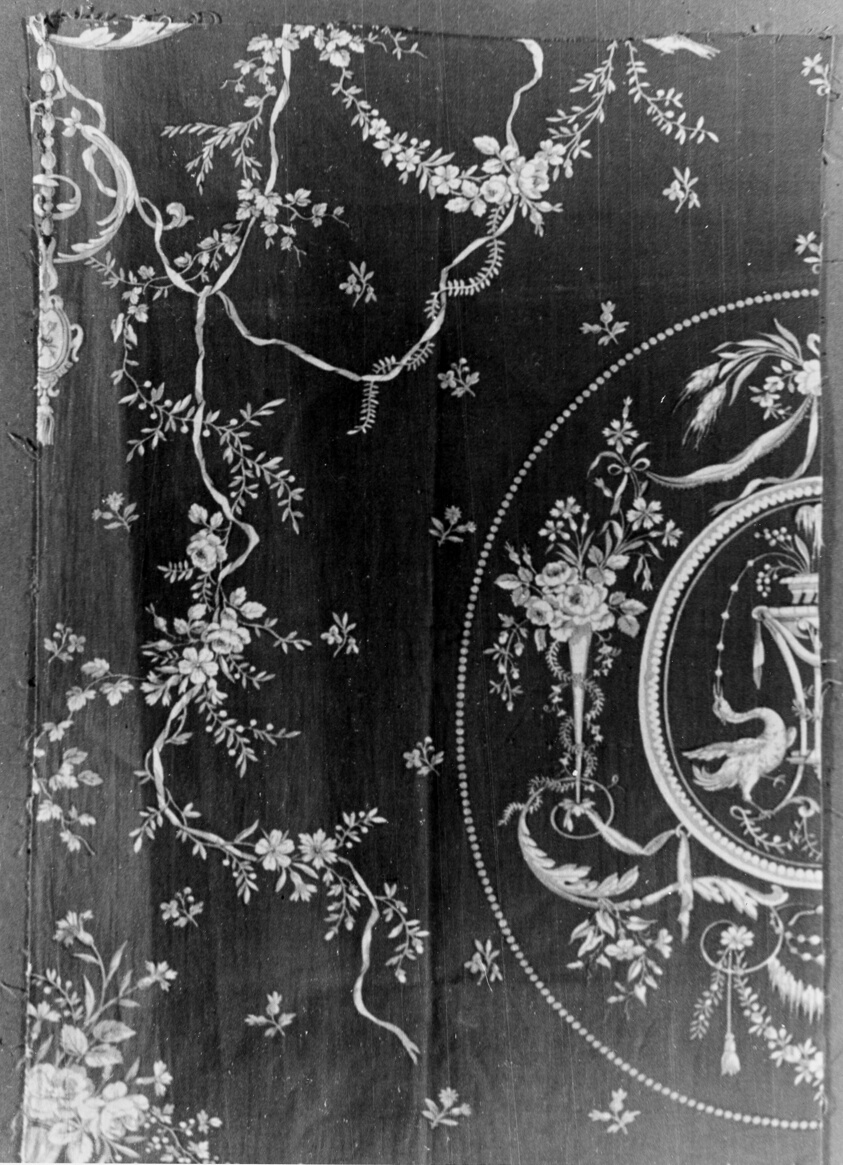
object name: Textile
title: Fragment (Furnishing Fabric)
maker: France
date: 1801/25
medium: cotton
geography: France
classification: textile; weaving - printed; furnishing textile